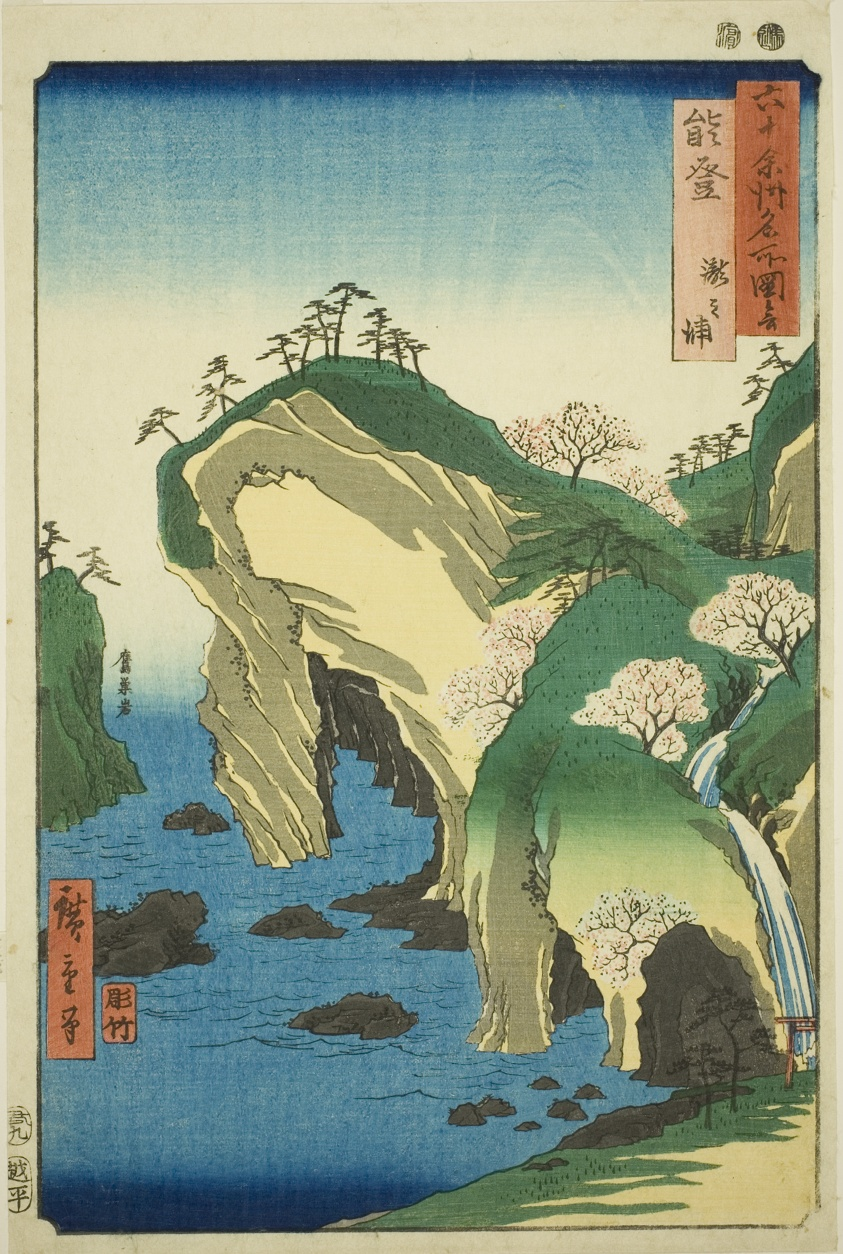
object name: Print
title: Noto Province: Bay of Waterfalls (Noto, Taki no ura), from the series "Famous Places in the Sixty-odd Provinces (Rokujuyoshu meisho zue)"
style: Japanese (culture or style)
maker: Utagawa Hiroshige 歌川 広重; Japanese, 1797-1858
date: 1853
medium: Color woodblock print; oban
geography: Japan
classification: woodblock print; print; asian art